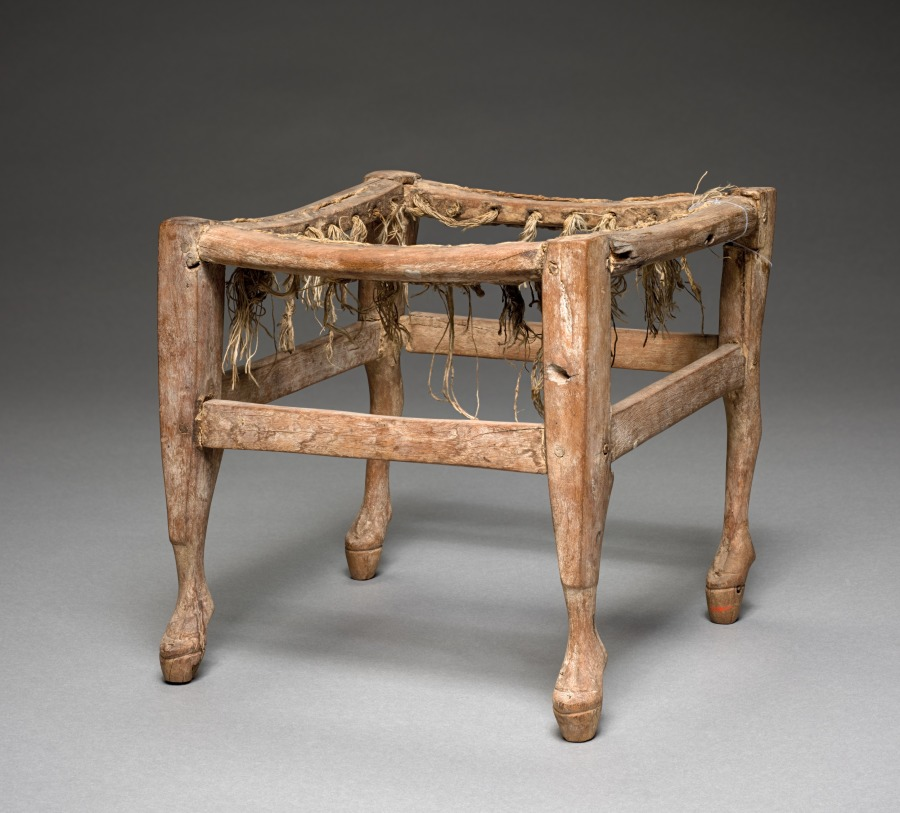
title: Child's Stool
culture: Egypt, New Kingdom (1540–1069 BCE), Dynasty 19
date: 1295–1188 BCE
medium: wood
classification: Funerary Equipment